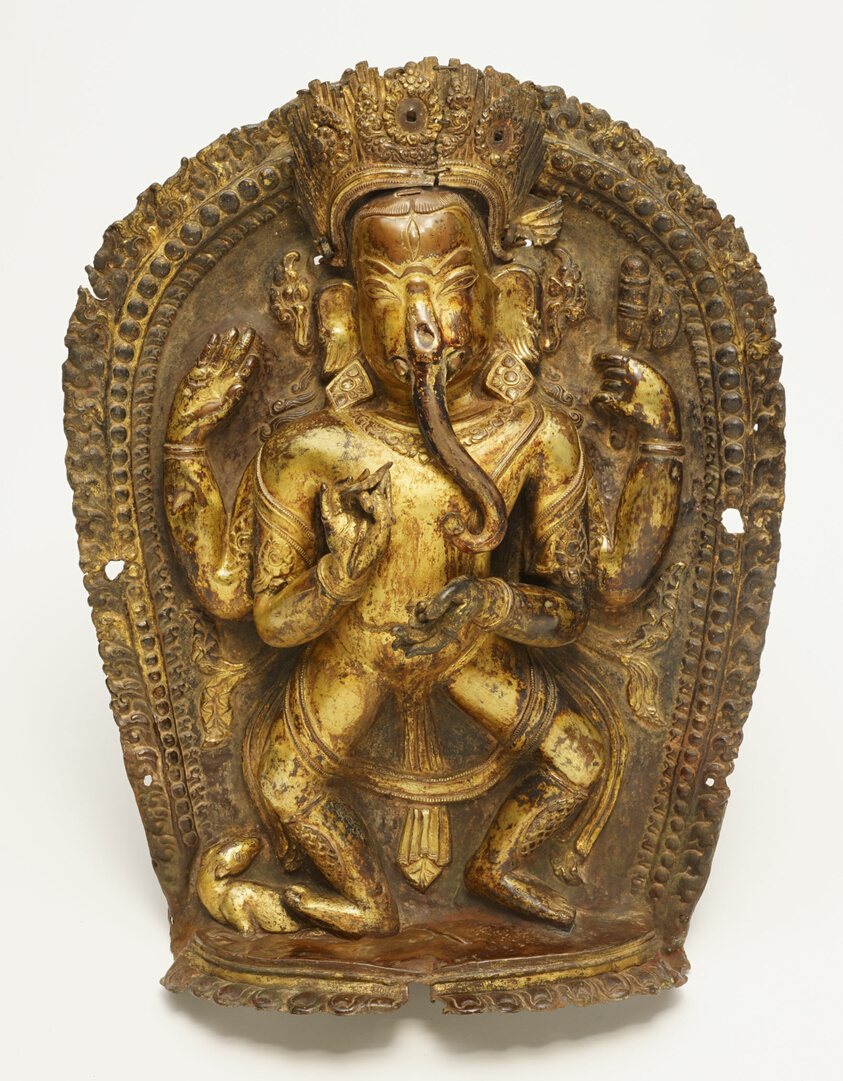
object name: Sculpture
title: Four-Armed Dancing God Ganesha with His Rat Mount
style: Himalayan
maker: Nepal; Kathmandu Valley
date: 16th/17th century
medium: Gilt bronze repoussé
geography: Nepal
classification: bronze; metal; sculpture; asian art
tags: Ganesha, Hindu, religion, dancing ganesha, gods (deities)